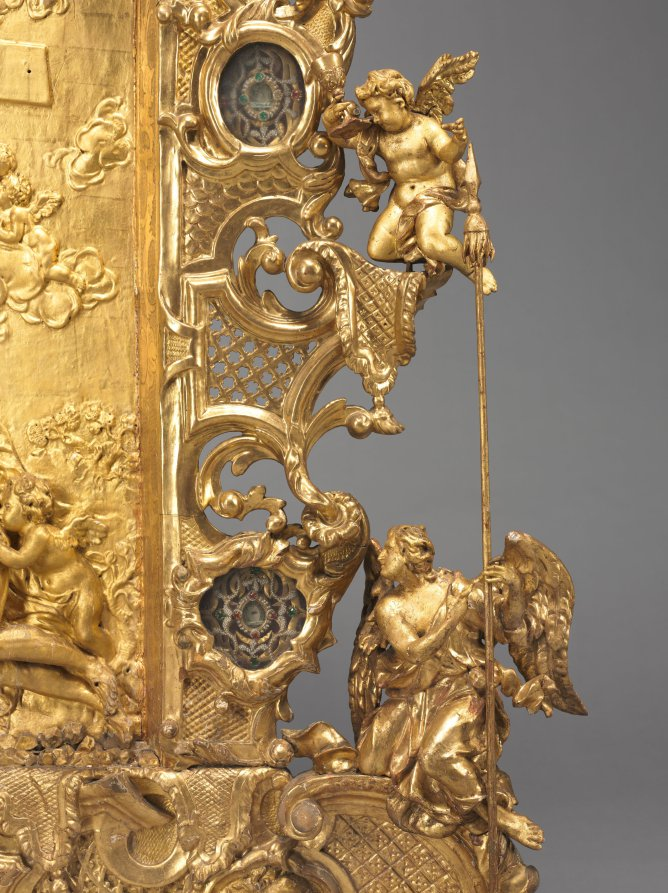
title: Altarpiece with Relics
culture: Germany, Bavaria, 18th century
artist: Joseph Matthias Götz (German, 1696–1760)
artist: and Workshop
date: c. 1735–40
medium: gilded wood, with relics in niches: gilded wood, mother-of-pearl, ebony, red silk, gold wire, seed pearls, rock crystal, pen and ink on paper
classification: Sculpture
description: Götz covers every surface in gold leaf, giving each part of the object equal importance, rather than simply framing a central picture. In this distinctively Central European approach, figural narrative is subordinate to the overall ensemble. Götz designed this object to rest on top of an altar, probably in front of a larger painted or sculpted decorative scheme. The work contains relics seen through the small windows on the perimeter. These small remains of holy figures demonstrate the persistence of a medieval Catholic tradition well into the 1700s.